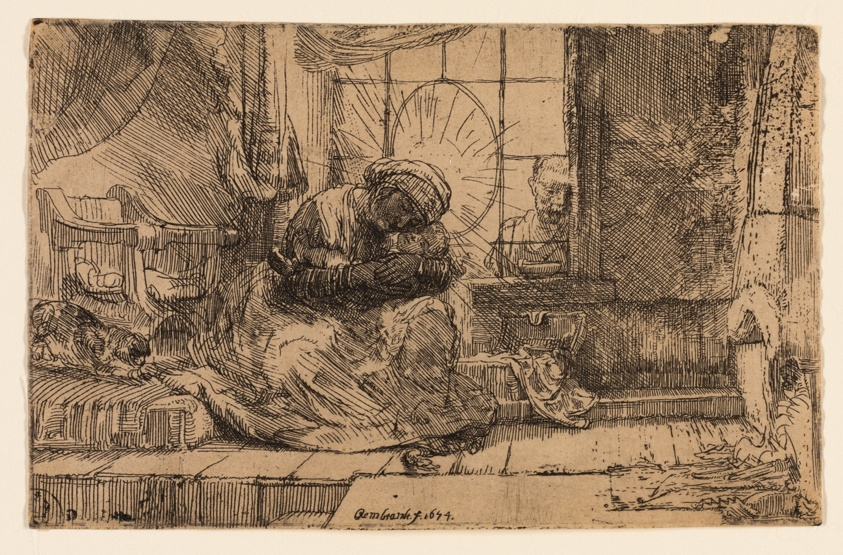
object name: Print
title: The Virgin and Child with the Cat and the Snake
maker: Rembrandt van Rijn (Dutch, 1606-1669)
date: 1654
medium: Etching on cream Japanese paper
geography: Holland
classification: etching; print; prints and drawing; paper